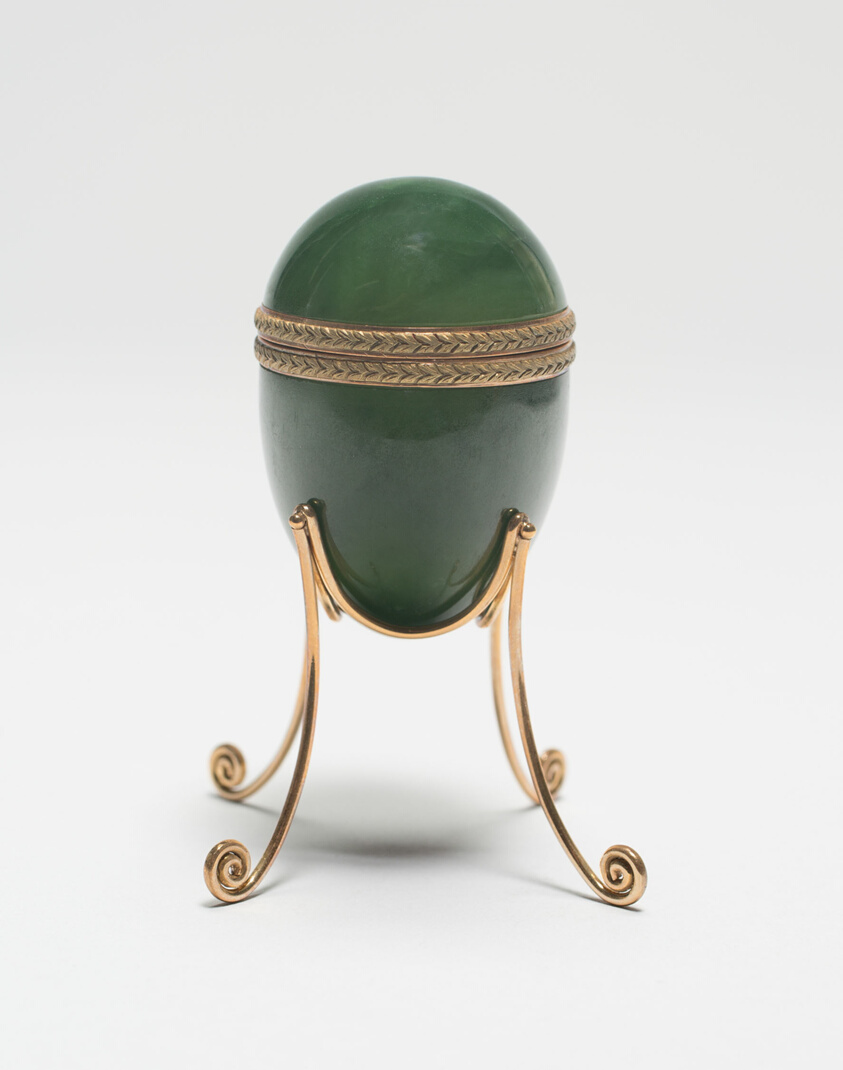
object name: Metalwork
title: Miniature Box with Lid in the form of an Egg and Stand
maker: Fabergé Workshop; Saint Petersburg or Moscow, Russia, 1862-1930; Master Craftsman: Henrik Wigstrom; Russian, 1862-c.1930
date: c. 1900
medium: Nephrite and gold mounts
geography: Saint Petersburg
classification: stone; miniature; european decorative arts; metalwork